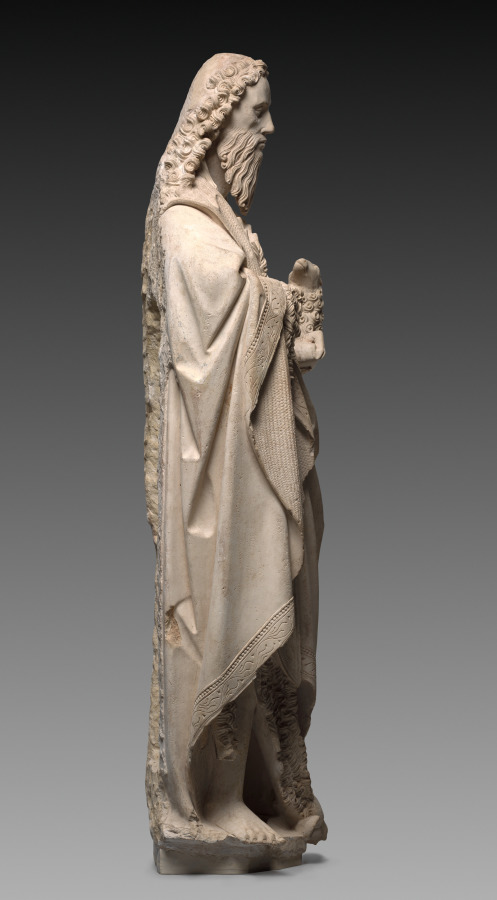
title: Saint John the Baptist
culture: French, Lorraine, Nancy or Bar-le-Duc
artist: attributed to Jan Crocq (Netherlandish, act. 1486–1510)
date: c. 1500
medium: Tonnerre limestone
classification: Sculpture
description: John the Baptist was one of the most beloved and widely venerated saints of the Middle Ages. He is depicted here wearing his traditional camel hair fleece beneath a luxuriant outer mantle. The sculpture is attributed to Jan Crocq, a Netherlandish artist active at the court of René II, Duke of Lorraine at Nancy from 1486 to 1510, and noted for his naturalistic treatment of hair and costume.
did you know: St. John the Baptist holds a book and a lamb, referencing his description of Christ as "the lamb of God."